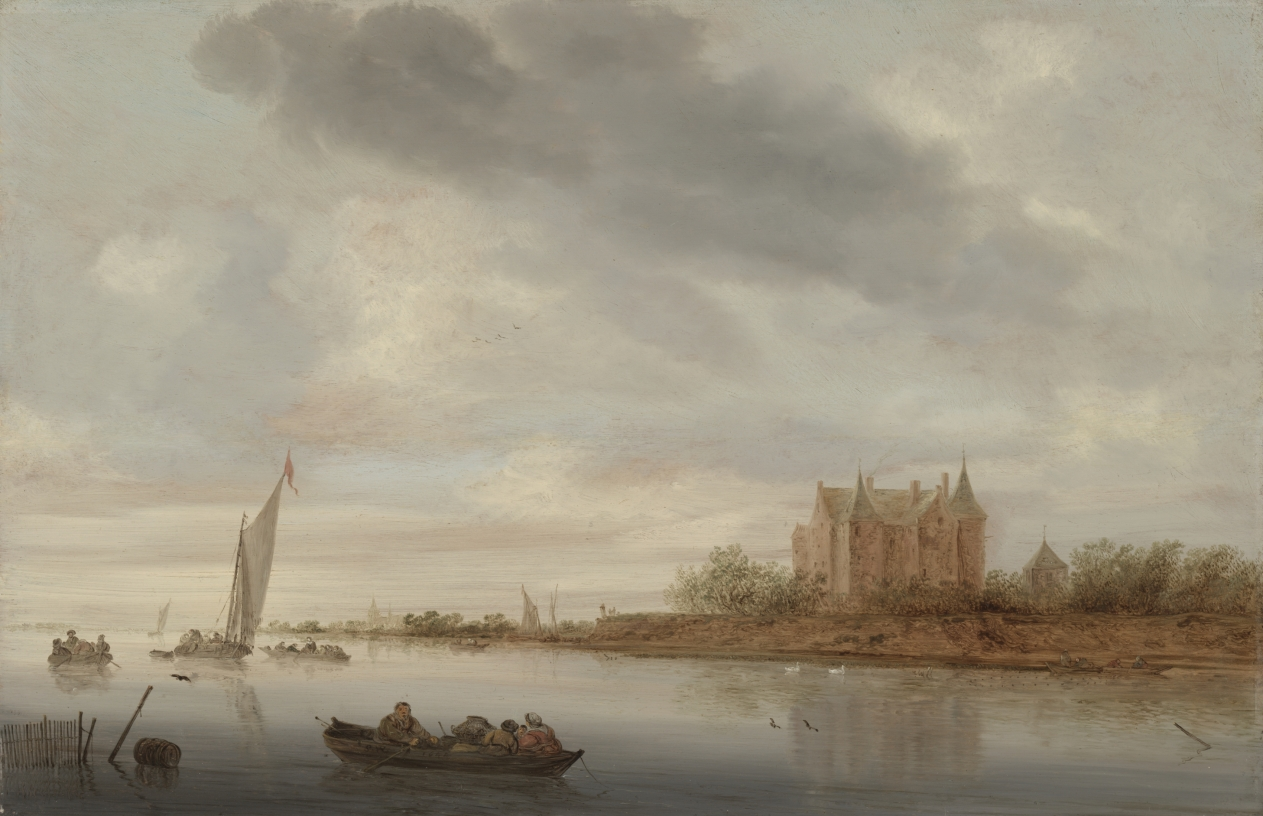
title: Castle on a River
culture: Netherlands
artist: Salomon van Ruysdael (Dutch, 1602–1670)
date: 1644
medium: oil on wood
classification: Painting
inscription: Signed lower left on boat: "S.VR / 1644 (VR in monogram]"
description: Salomon van Ruysdael, the uncle of Jacob van Ruisdael, here represents a free interpretation of the Castle Loevenstein. In addition to its picturesque qualities, the castle had great political and cultural importance as the official state prison and a key fort in the southern Netherlands. Painted just before the Dutch won independence from Spain in 1648, the painting likely expressed nationalist pride for its owner.